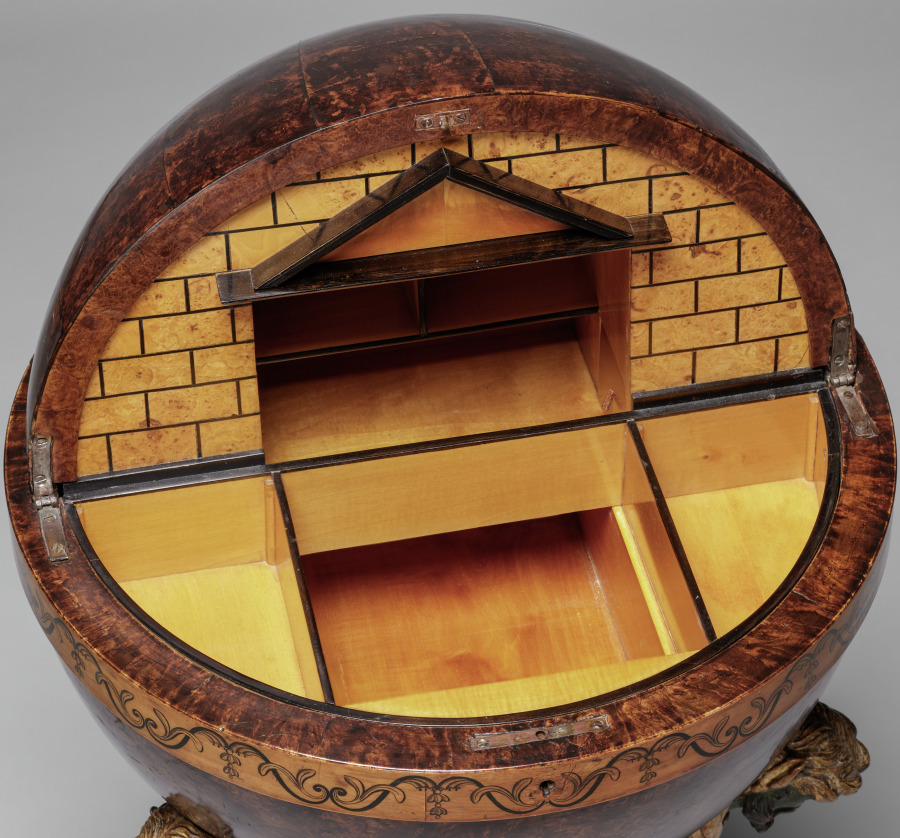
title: Globe Work Table (Globustisch)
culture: Austria, Vienna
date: c. 1810–15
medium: Burl walnut veneer, mahogany, ebony, satinwood, gilt wood, painted wood; mirrored glass; metal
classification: Furniture and woodwork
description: Work tables resembling globes were the usual form for a lady's sewing or writing table around 1800 in Austria. Combining moving parts, secret compartments, and highly finished decoration, these tables were also a way for the cabinetmaker to show off his skill. The tripod supports and temple-like architectural quality of both the exterior and interior decoration reflect the fashionable taste for neoclassical style, or Biedermeier as it was called in Austria, where Vienna was the center of such elaborate furniture production.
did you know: The top half of the globe rotates upward to reveal hidden compartments for sewing tools, threads, and unfinished fabric pieces.